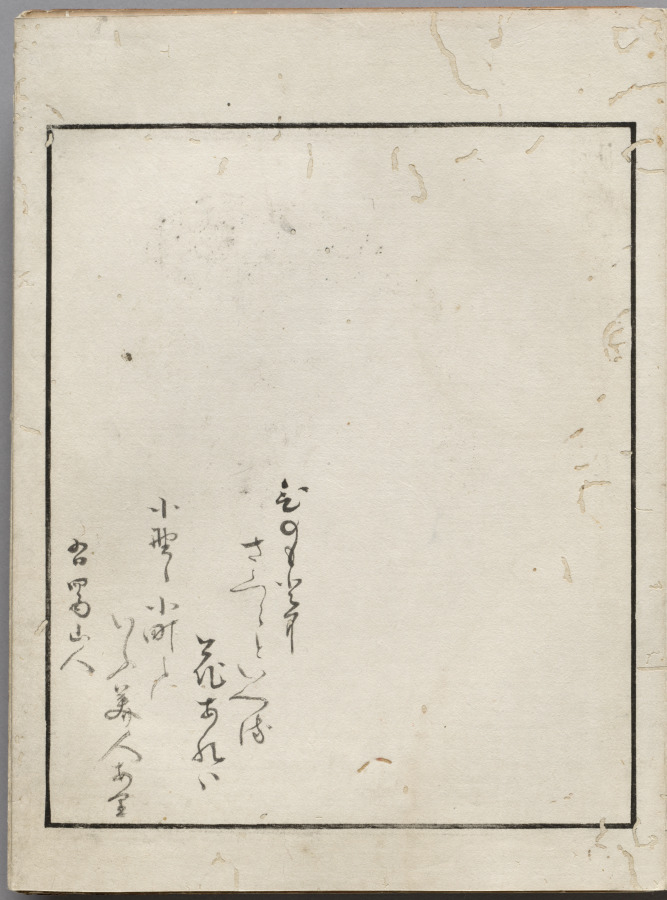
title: Double-Leaf from Album of Actor Portraits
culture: Japan, Edo period (1615–1868)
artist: Shōrakusai (Japanese)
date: c. 1790–1810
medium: double-leaf from an accordion-style album; ink and color on silk (right), and ink on paper (left)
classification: Bound Volume